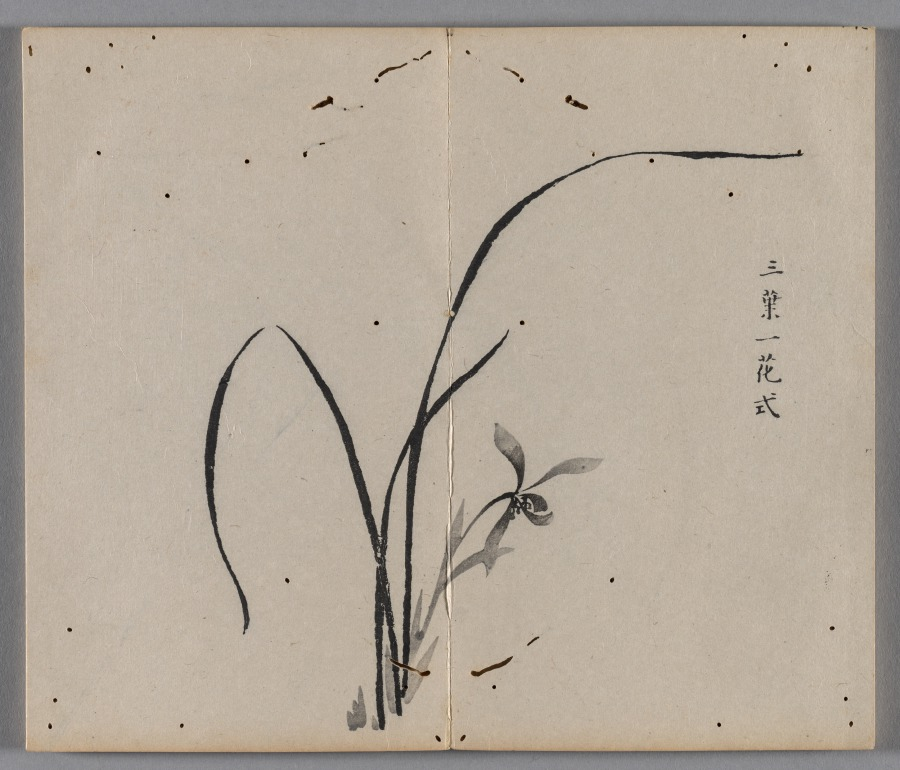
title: Ten Bamboo Studio Painting and Calligraphy Handbook (Shizhuzhai shuhua pu): Orchids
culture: China, Qing dynasty (1644-1911)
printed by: Hu Zhengyan (Chinese, c. 1584–1674)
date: 1633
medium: Woodblock-printed book; ink and colors on paper; first edition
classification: Print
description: Color printing reached a level of perfection in the early 1600s, as seen in this Ten Bamboo Studio Collection of Calligraphy and Painting and the Mustard Seed Garden Manual of Painting (printed 1679 and 1701). The painterly quality, precision in registering (aligning) the woodblocks, and harmonious colors made them the most successful color print editions in Chinese history. Both editions were printed and compiled in Nanjing, spread nationwide, and had a great impact on the arts in Japan and Korea.